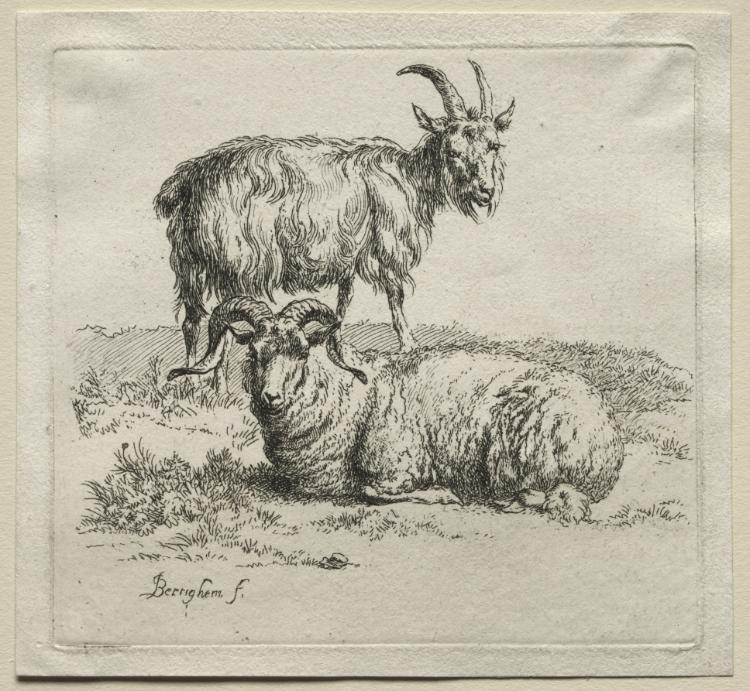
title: Animalia: Ram and Goat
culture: Netherlands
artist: Nicolaes Berchem (Dutch, 1620–1683)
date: 1635–83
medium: etching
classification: Print